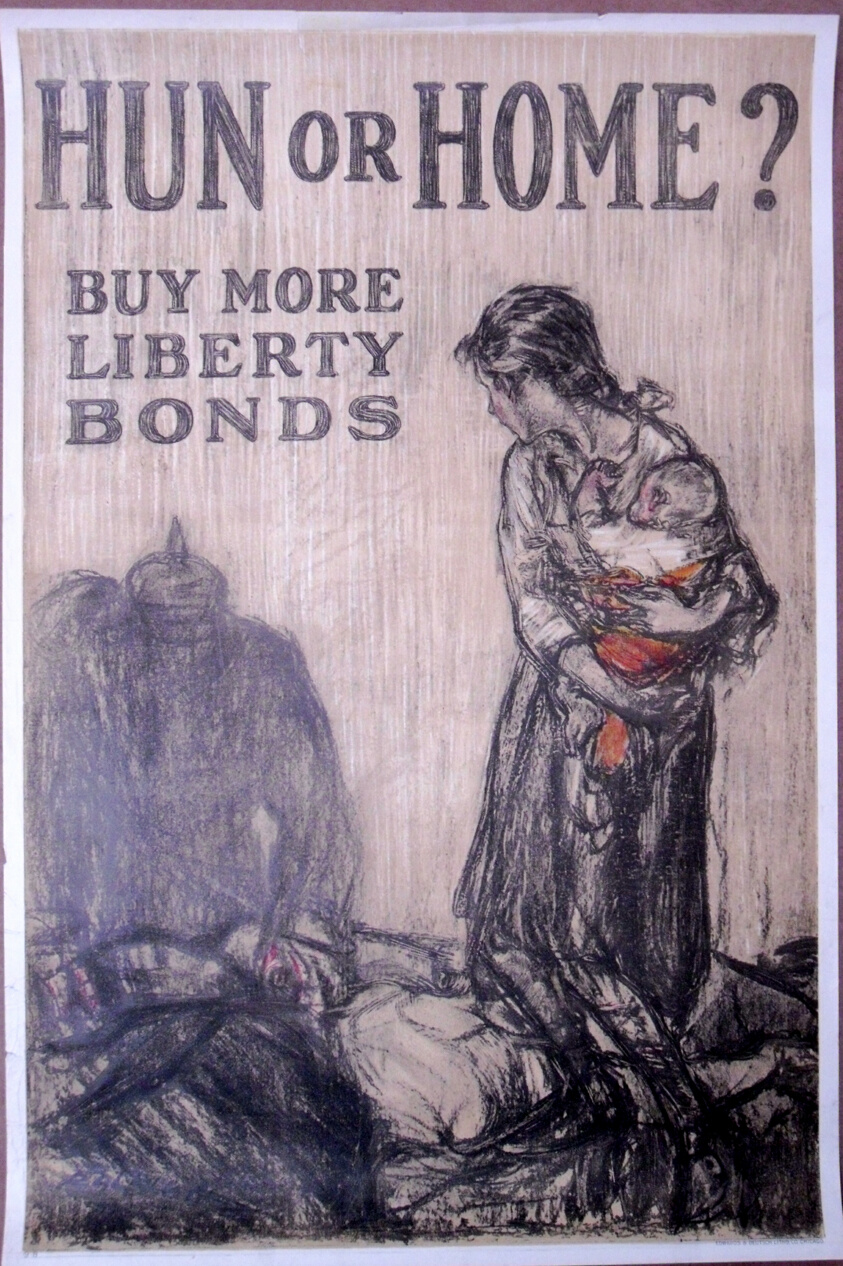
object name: Print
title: Hun or Home?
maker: Henry Patrick Raleigh (American, 1880-1945); printed by Edwards & Deutsch Litho. Company (American, 20th century)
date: 1918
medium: Color lithograph on cream wove paper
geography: United States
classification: poster; print; prints and drawing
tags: propaganda